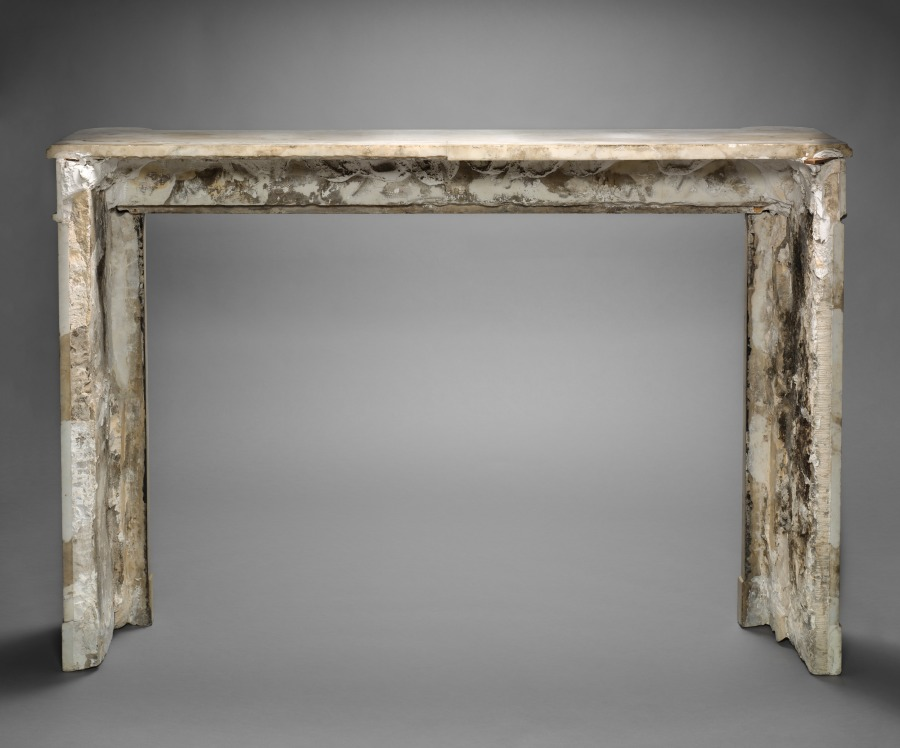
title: Mantel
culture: France, style of Louis XVI, 18th Century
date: c. 1770–1790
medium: marble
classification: Furniture and woodwork